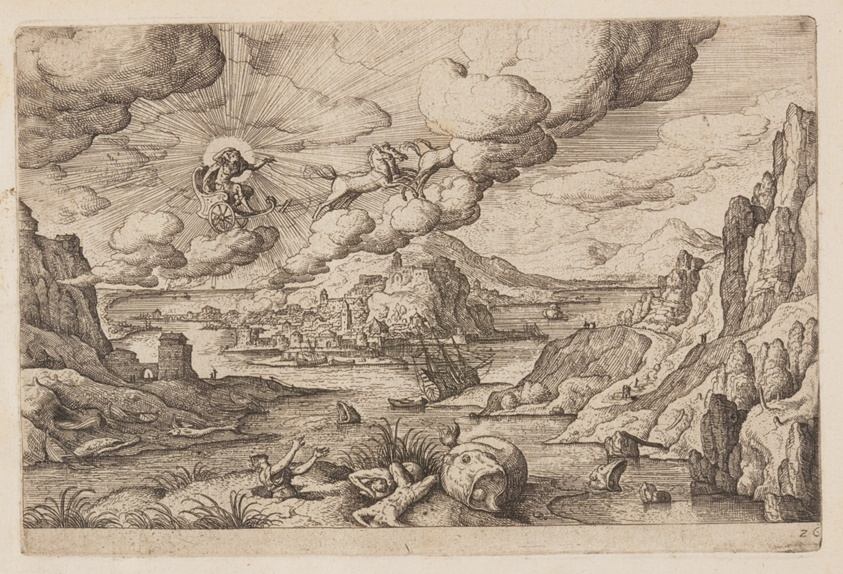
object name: Print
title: Plate 26, from Landscapes with Scenes from the Old and New Testament and Ovid’s Metamorphoses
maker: Hans Bol (Flemish, 1534–1593); published by Philip Galle (Flemish, 1537–1612)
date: 1574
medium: Etching on ivory laid paper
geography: Flanders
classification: print; paper; prints and drawing; etching